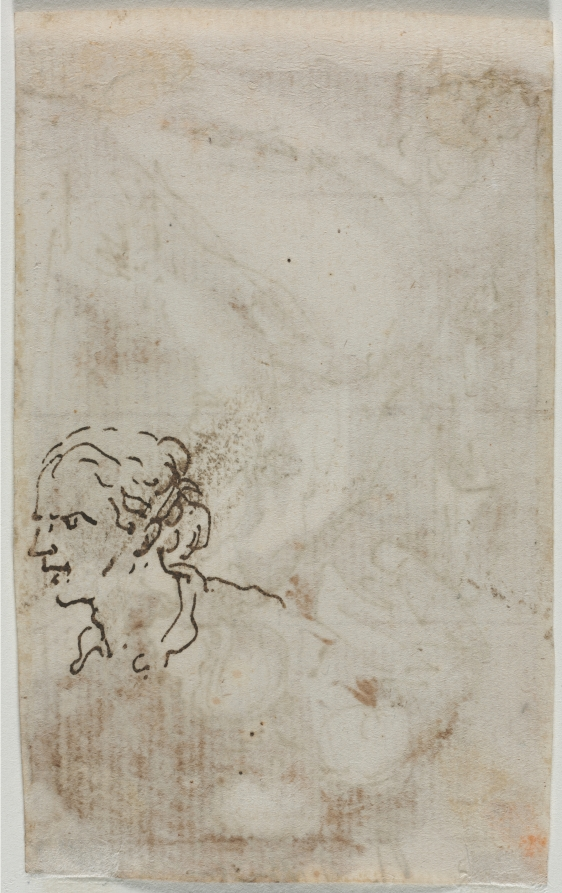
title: Figure Studies (verso)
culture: Italy, 17th century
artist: Salvator Rosa (Italian, 1615–1673)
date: c. 1640–1649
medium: pen and brown ink and wash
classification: Drawing